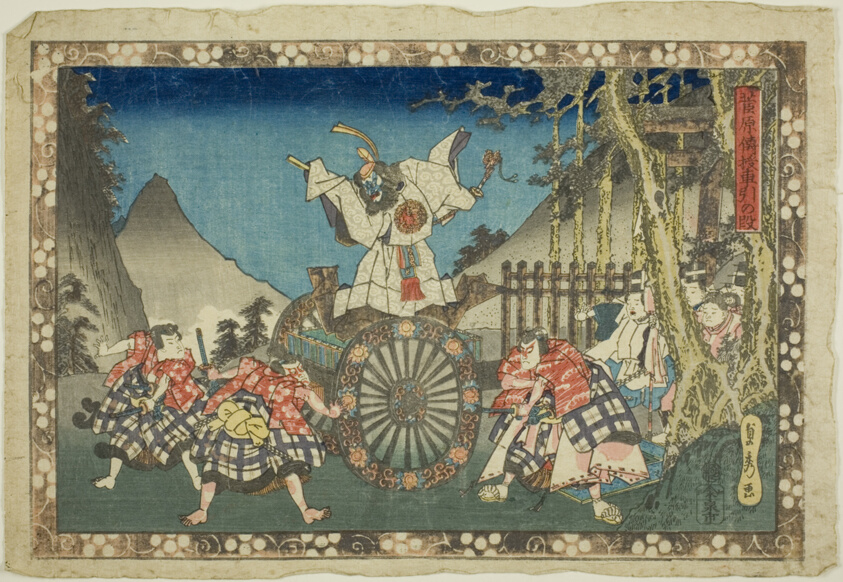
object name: Print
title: The Carriage-pulling Scene (Kurumabiki no dan), from the series "Sugawara's Secrets (Sugawara denju)"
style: Japanese (culture or style)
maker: Utagawa Sadahide (Japanese, 1807-1873)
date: c. 1830/44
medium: Color woodblock print; oban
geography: Japan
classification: print; asian art